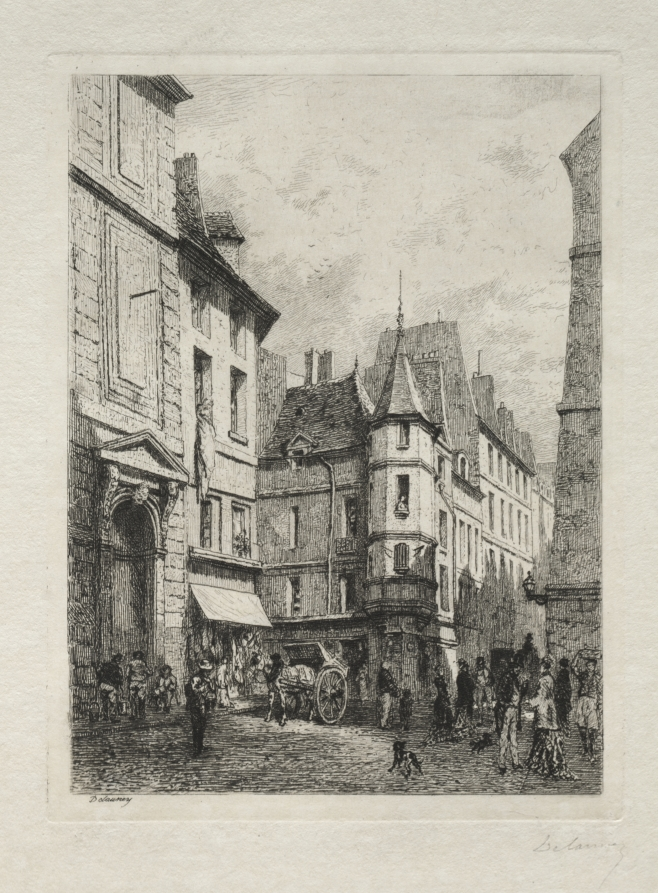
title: Tourelle en Fontaine Rue d'Ecole de Medicines demolies en 1877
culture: France, 19th century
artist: Alfred Alexandre Delauney (French, 1830–1894)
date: c. 1870–94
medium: etching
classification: Print